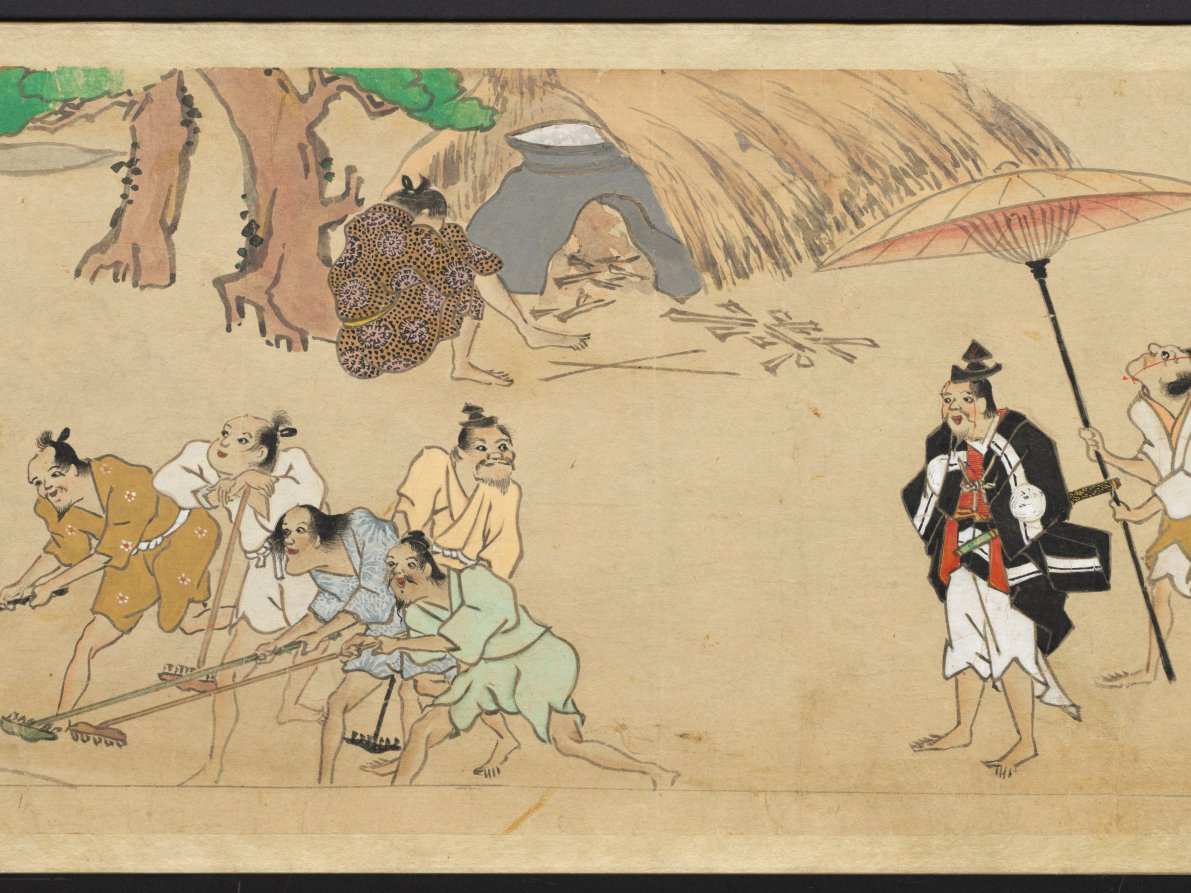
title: The Saltmaker's Story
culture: Japan, Edo period (1615–1868)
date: early 1600s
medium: One of a pair of handscrolls; ink, color, and gold on paper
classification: Painting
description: Once read and copied by girls at New Year’s celebrations and included in dowries, The Saltmaker’s Story is a rags-to-riches tale in which daughters are gifts from the gods. Despite his simple outlook, the main character progresses from humble roots as an associate at Kashima Shrine to the elite status of grandfather of the emperor through the intervention of the Kashima deity. The Saltmaker’s Story is traditionally presented in a set of three scrolls, but the text of this set has been removed by a previous owner, who remounted the illustrations as a pair. The paintings of this one take us from right to left through the first half of the tale.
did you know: This handscroll originally had texts before its paintings, but the texts were removed.